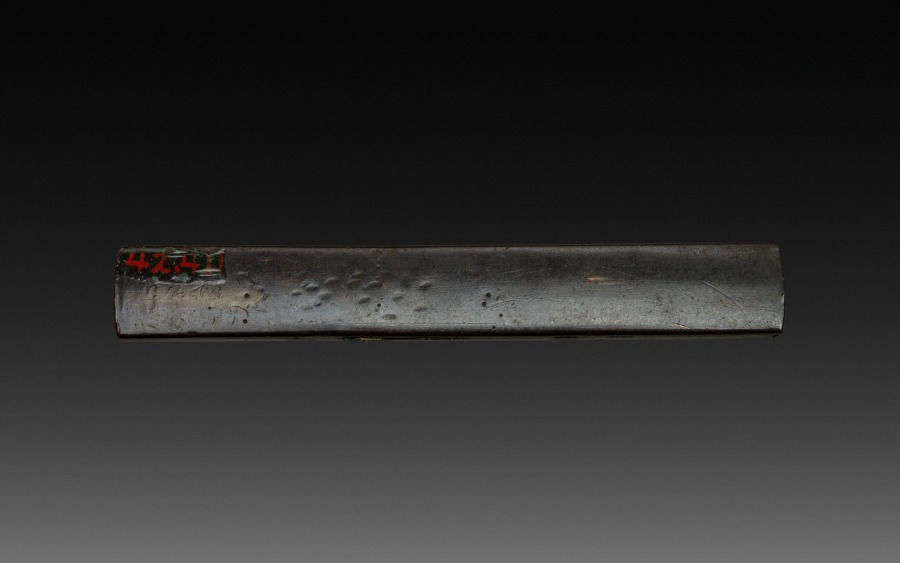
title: Knife Handle (Kozuka)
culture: Japan, Edo period (1615–1868)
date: c 1800s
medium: inlaid bronze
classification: Metalwork